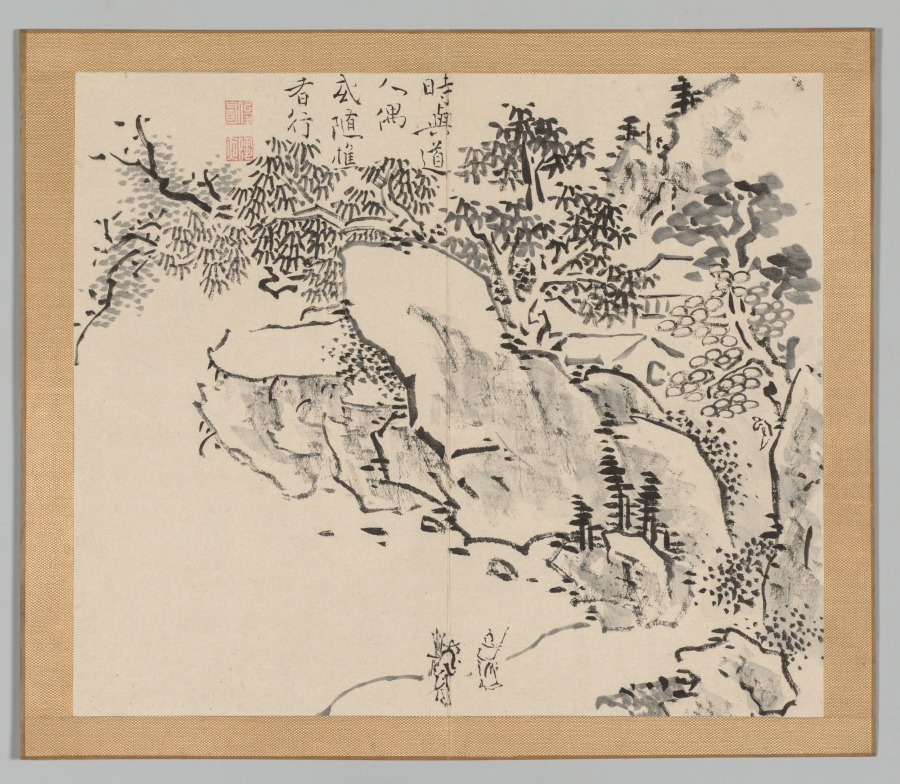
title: Reverberations of Taiga, Volume 2 (leaf 34)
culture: Japan, Edo period (1615–1868)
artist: Aoki Shukuya (Japanese, d. 1802)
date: mid- to late 1700s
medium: double-leaf from a pair of albums; ink and light color on paper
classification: Portfolio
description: Traditionally, young painters in Japan began their studies with an established master-painter. The master's compositions invariably became models that the apprentice copied to learn various ink and brush techniques. Shukuya was a pupil of the famous Kyoto artist Ikeno Taiga, whose style is reflected in these sketches of rocks, trees, and mountains.